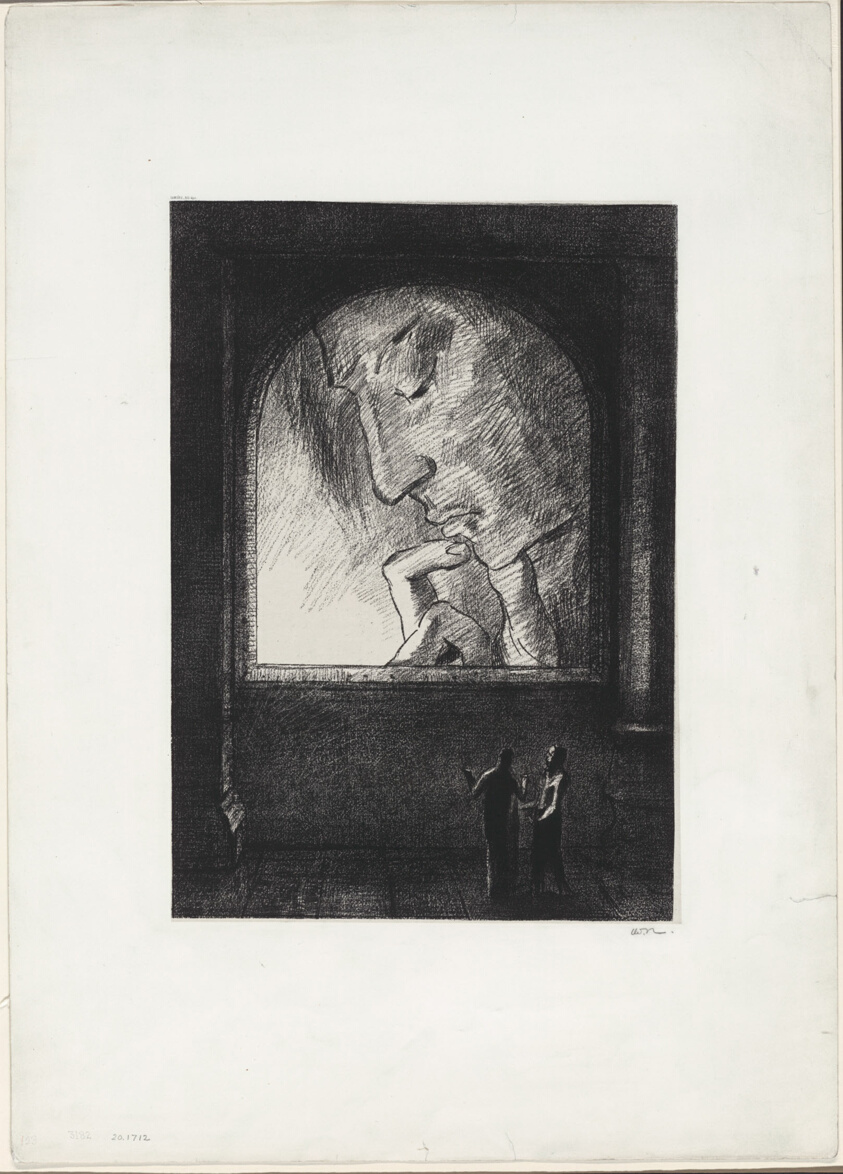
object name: Print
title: Light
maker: Odilon Redon (French, 1840-1916)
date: 1893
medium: Lithograph on cream chine laid down on ivory wove paper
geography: France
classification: lithograph; print; prints and drawing; paper